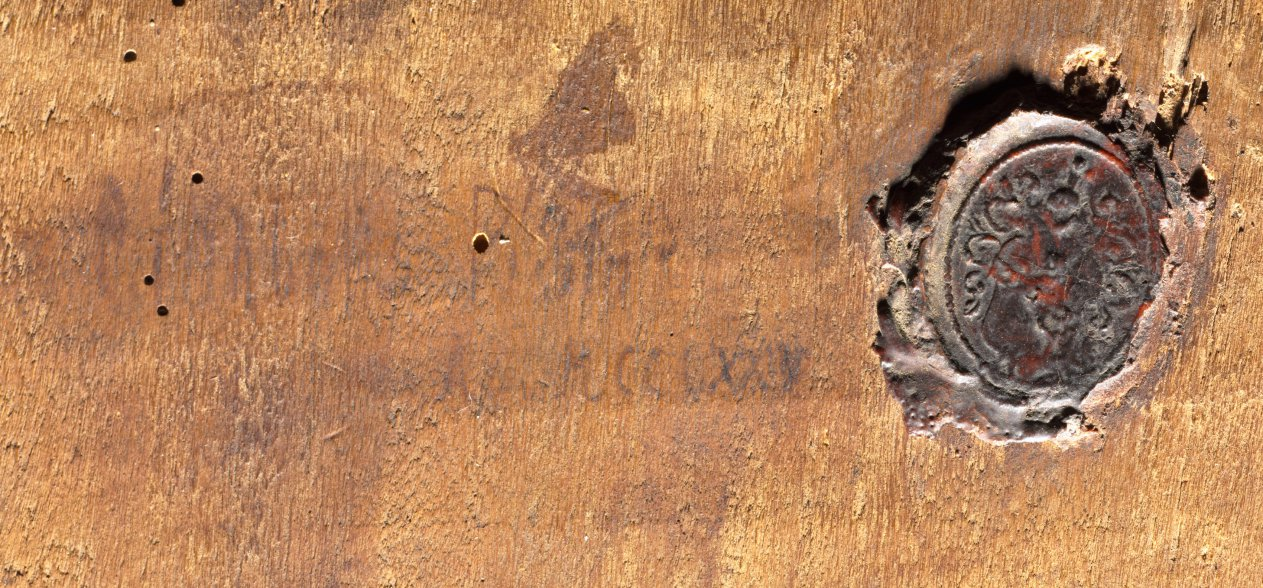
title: Icon of the Mother of God and Infant Christ (Virgin Eleousa)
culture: Republic of Venice, Kingdom of Candia, Candia (Heraklion, Crete, Greece) or Byzantine Empire, Constantinople (Istanbul, Turkey)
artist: attributed to Angelos Akotantos (Cretan, died 1450)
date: c. 1425–50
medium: tempera and gold on wood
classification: Painting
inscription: None visible on obverse; unidentified inscriptions on reverse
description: This large icon of a tender embrace between the Virgin Mary and Christ likely hung on a Greek Orthodox church’s iconostasis, a screen separating the congregation from the altar-containing sanctuary, which only clergy could enter. A skilled painter of faces and draperies, Angelos Akotantos was among Crete’s most sought-after artists. Based in Byzantium’s artistic center in his hometown of Candia, he painted for imperial clients and beyond. Despite theological differences, Cretan icons of Mary were popular in Ethiopia. In the early 1500s, Emperor Lebna Dengel sent monks Zekre and Pawli to acquire Cretan icons for him. Twenty-nine Cretan icons are still venerated (honored) in Ethiopian churches.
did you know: This is the only known work by Angelos Akotantos in the United States.